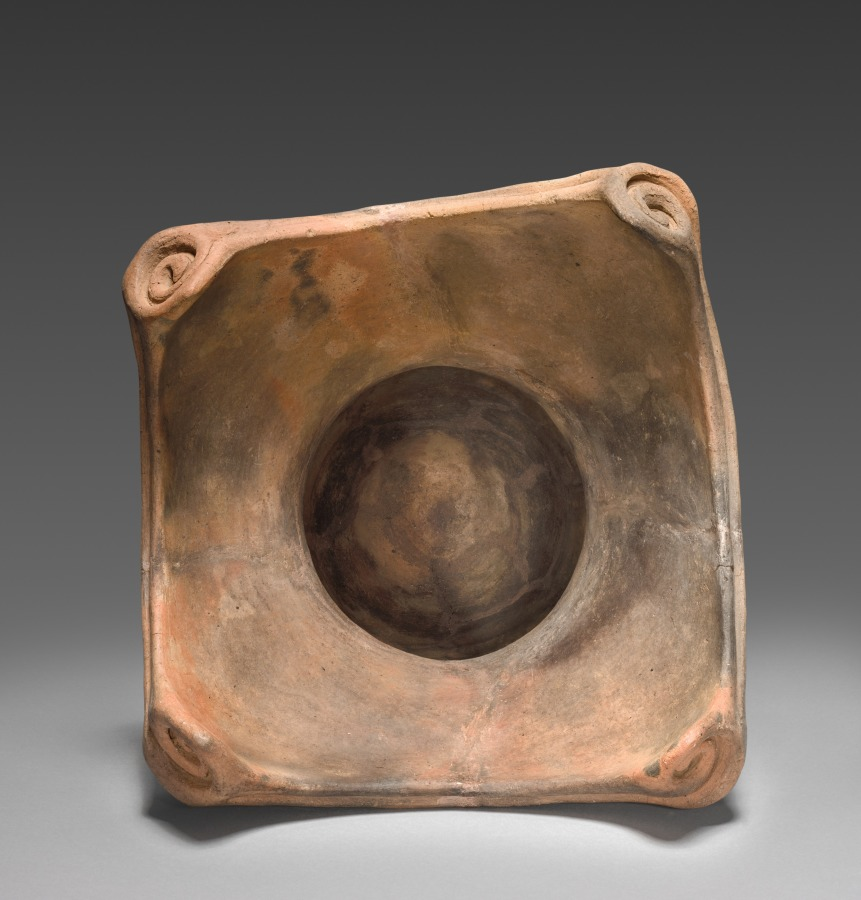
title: Deep Vessel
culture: Japan, Jōmon period (c. 10,500–300 BCE)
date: c. 2500 BCE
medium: Earthenware with impressed and carved decoration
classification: Ceramic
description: This cooking vessel was formed by piling coils of clay atop one another, smoothing and thinning the walls, and then adding surface decoration. Vertical incised squiggle lines as well as diagonal impressed cord patterns create texture. The mouth rises in four dramatic triangular forms, each with a coiled design inside.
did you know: Jōmon, impressed rope patterns, are typical of vessels of this era, so archaeologists named the period after them.